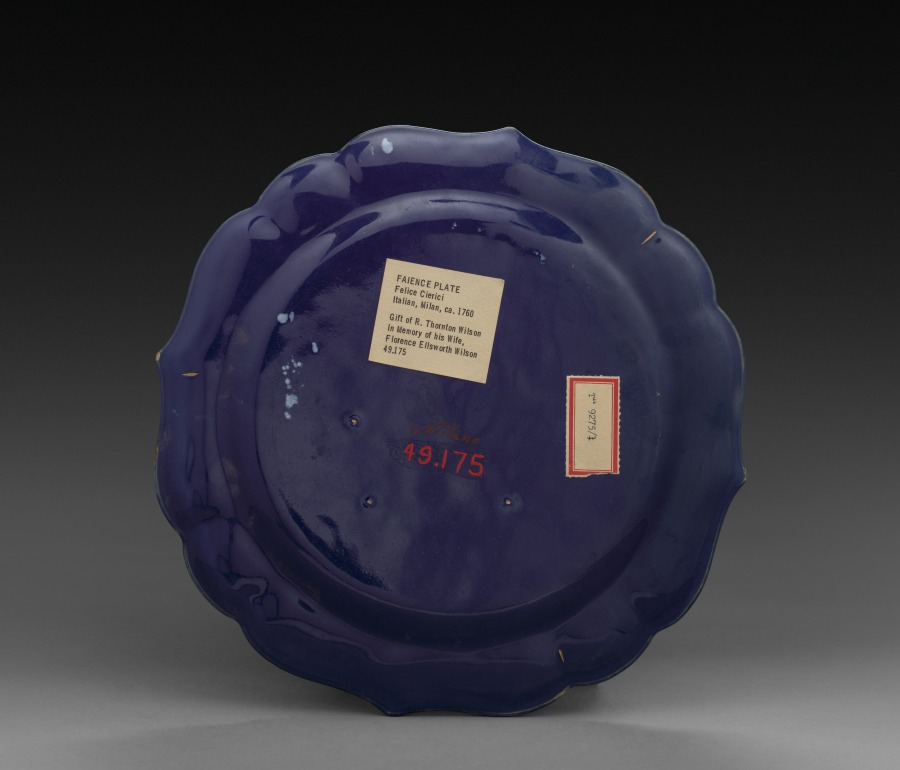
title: Faience Plate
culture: Italy, 18th century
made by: Felice Clerici (Italian)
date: c. 1760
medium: faience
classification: Ceramic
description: The use of colored ground with the irregularly shaped reserve panels with figural decorations reflects the influence of other European ceramics, particularly Meissen porcelain. The decorations of this plate are charmingly naive and demonstrate the efforts of Italian ceramic makers to keep abreast of current fashions in the field.